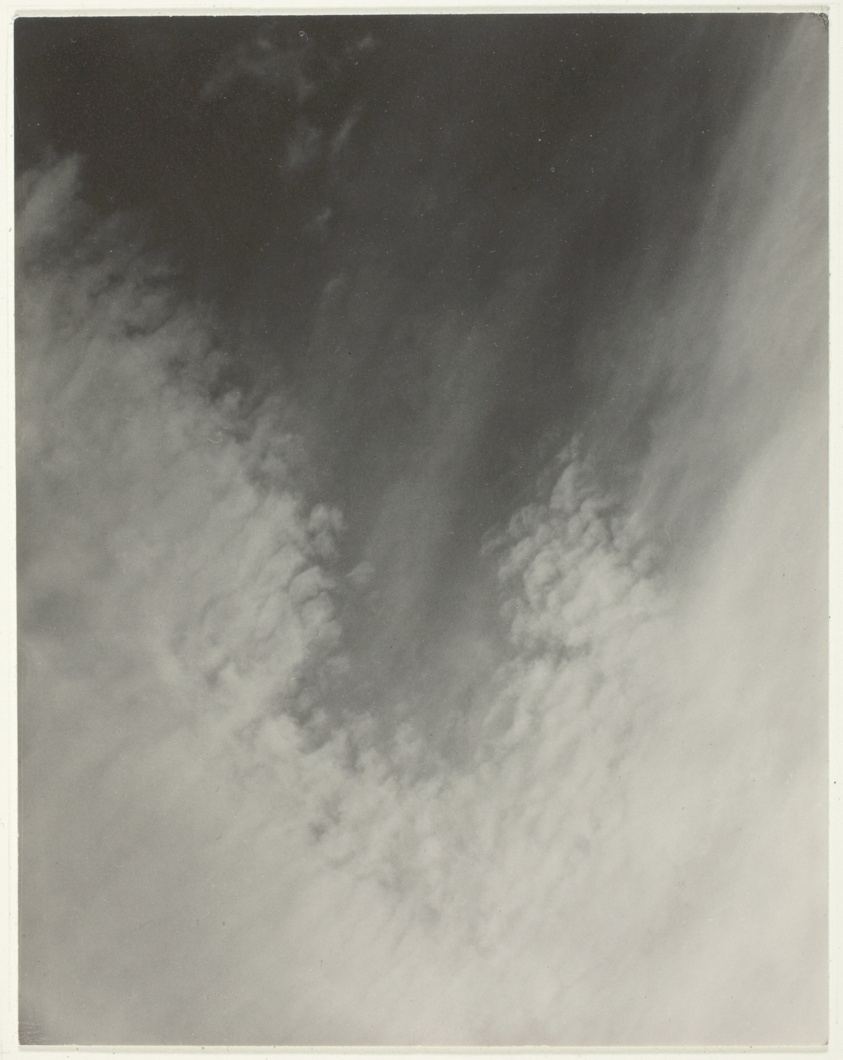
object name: Photograph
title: Equivalent, from Set E (print 2)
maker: Alfred Stieglitz (American, 1864–1946)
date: 1923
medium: Gelatin silver print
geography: United States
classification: gelatin silver (developing-out-paper) pr; photographic process; photography; photograph